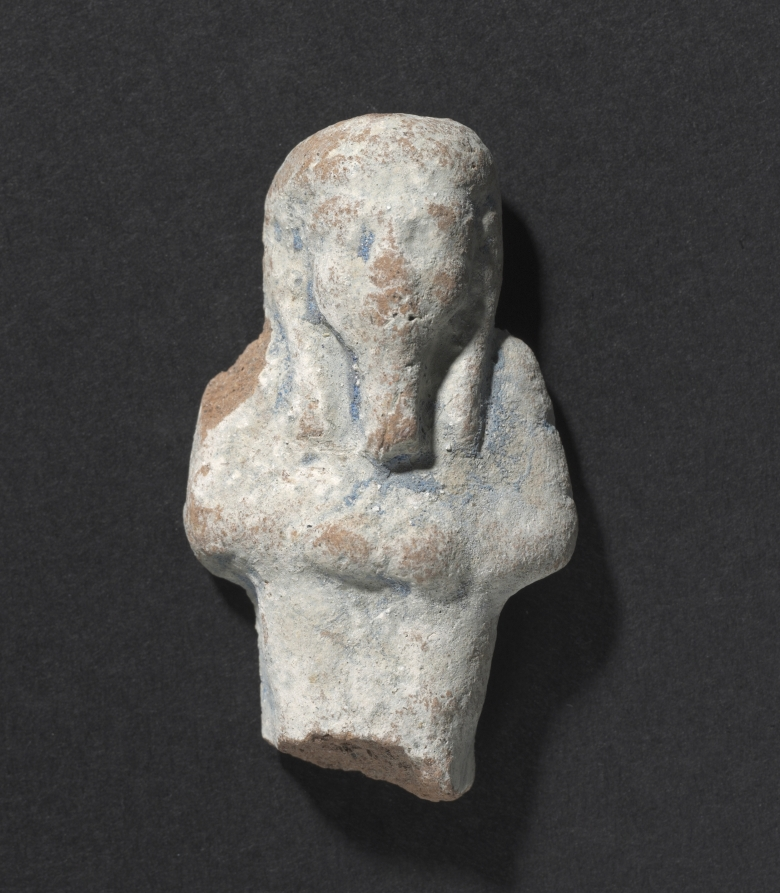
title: Shawabty of Ditamenpaankh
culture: Egypt, Late period (715–332 BCE), Dynasty 25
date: 715–656 BCE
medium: terracotta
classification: Funerary Equipment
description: High demand for shawabtys in the Late Period, a time when as many as 400 or more shawabtys were placed in the tomb with the deceased, gave rise to a specialized container for storing them: the shawabty box. This example is inscribed for the lady of the house, Ditamenpaankh, and was probably one of a pair originally made for her. The single-masted boat on the box's lid is perhaps an allusion to the pilgrimage of the deceased to the holy city of Abydos, the cult city of Osiris, king of the dead. The shawabtys inside are crude, mass-produced examples cast in an open mold. Made of terracotta, their blue paint imitates more costly shawabtys made of faience. As for the shawabty spell, it has been removed from its traditional location on the shawabty's front and relocated onto the sides of box, where it needed only to be written once, thus expediting production.